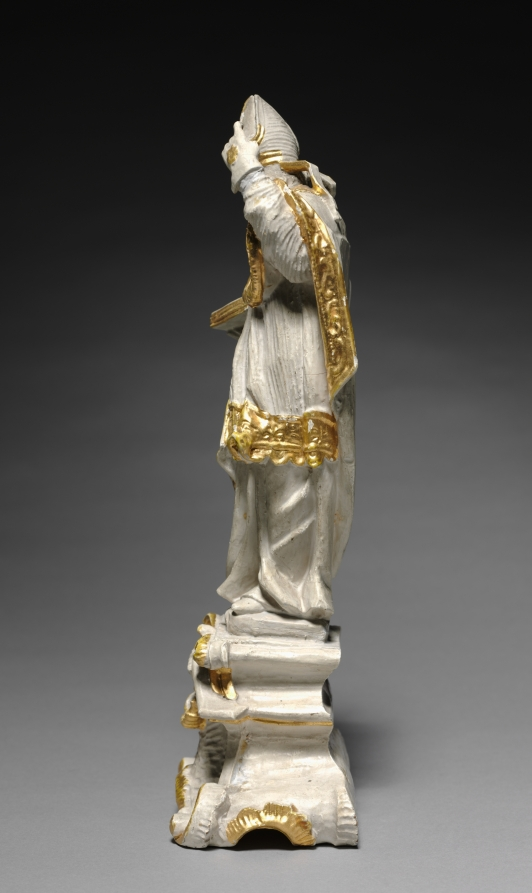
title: Bishop Saint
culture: Germany, 18th century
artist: attributed to Ferdinand Tietz (Austrian, 1708–1777)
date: c. 1740–1750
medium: painted and gilded wood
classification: Sculpture